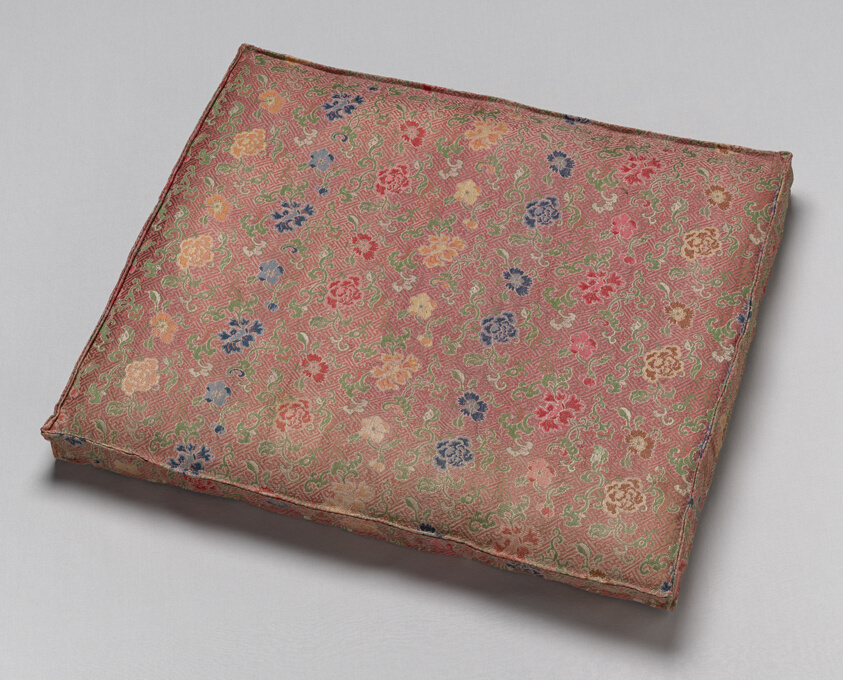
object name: Textile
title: Cushion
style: qing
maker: China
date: Qing dynasty (1644– 1911), late 19th century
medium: Silk, warp-float faced 5:1 satin weave with weft-float faced 1:2 'S' twill interlacings of secondary binding warps and supplementary patterning and self-patterning ground wefts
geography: China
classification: textile; weaving